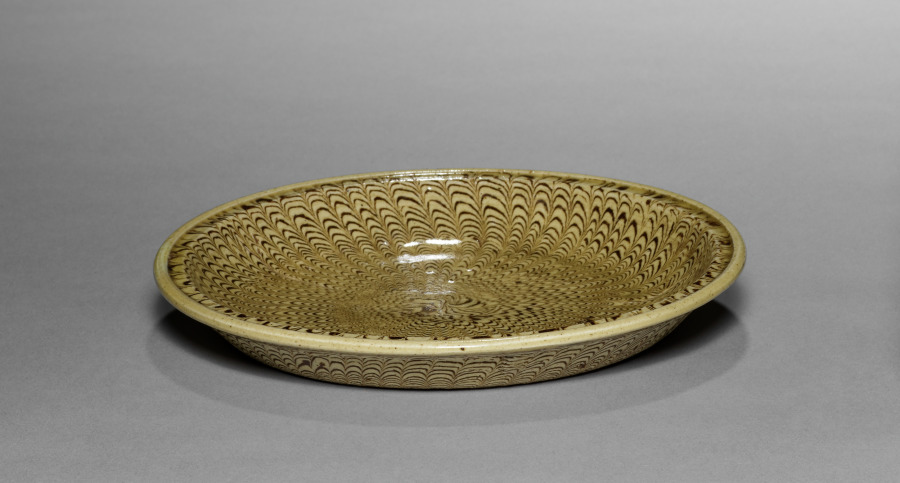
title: Flat Dish Made of Marbled Clay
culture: North or Central China, Northern Song (960–1127) or Jin dynasty (1115–1234)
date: 960–1234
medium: Stoneware with marbled clay and transparent glaze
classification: Ceramic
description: Using the marbling technique, in which light- and dark-colored clays are kneaded together (jiaotai; 絞胎), this dish is entirely covered with a transparent glaze, further enhancing the contrasting effect. The mixed clay technique had been used in northern China since the Tang dynasty (618–906), suggesting that potters may have attempted to imitate the effect of precious marbled glass from the ancient Near East that was traded via the Silk Road. The Keithleys acquired this dish to accompany the monumental ink drawing Poetic Pattern of Song Ware (CMA 2020.146) in their collection, that was inspired by such a ceramic.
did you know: This dish features lively contrasting black and beige clay marbling underneath a transparent glaze.